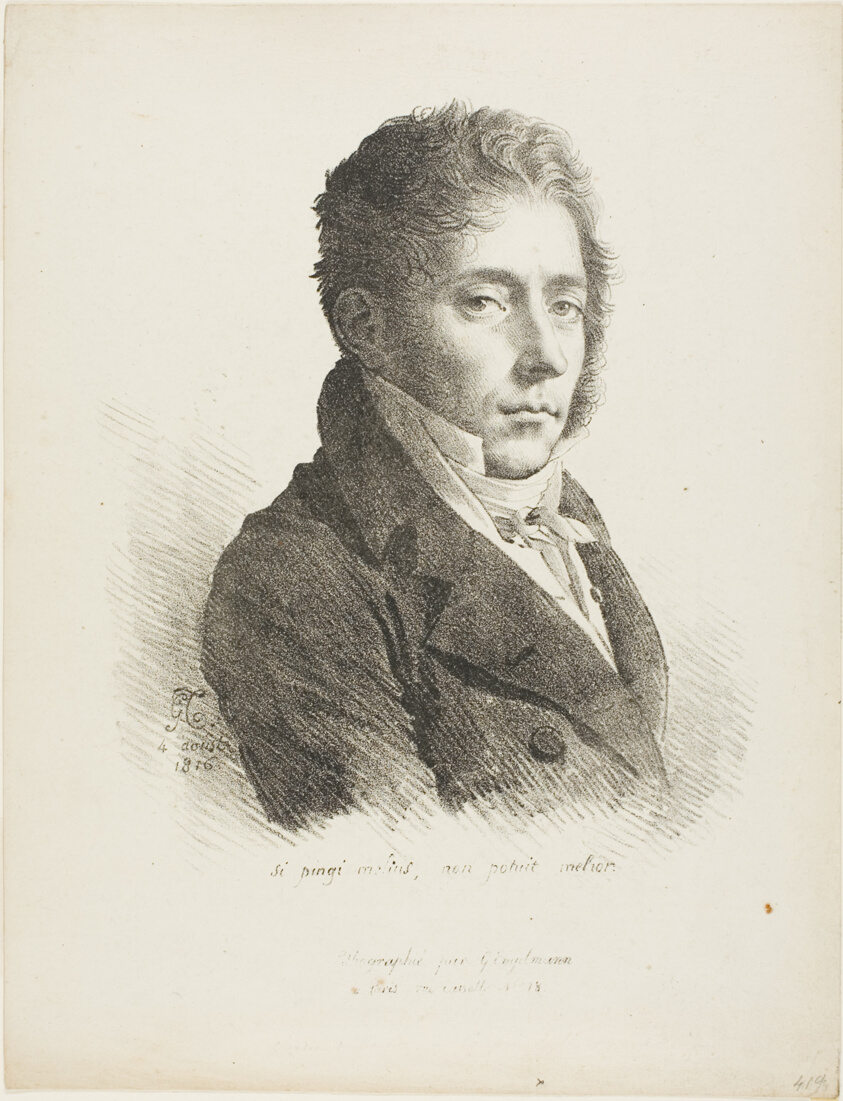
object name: Print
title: Portrait of Coupin de la Couperie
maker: Anne-Louis Girodet de Roucy-Trioson (French, 1767-1824); printed by Gottfried Engelmann (French, 1788-1839)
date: 1816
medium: Lithograph in black on cream wove paper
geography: Paris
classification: lithograph; print; prints and drawing